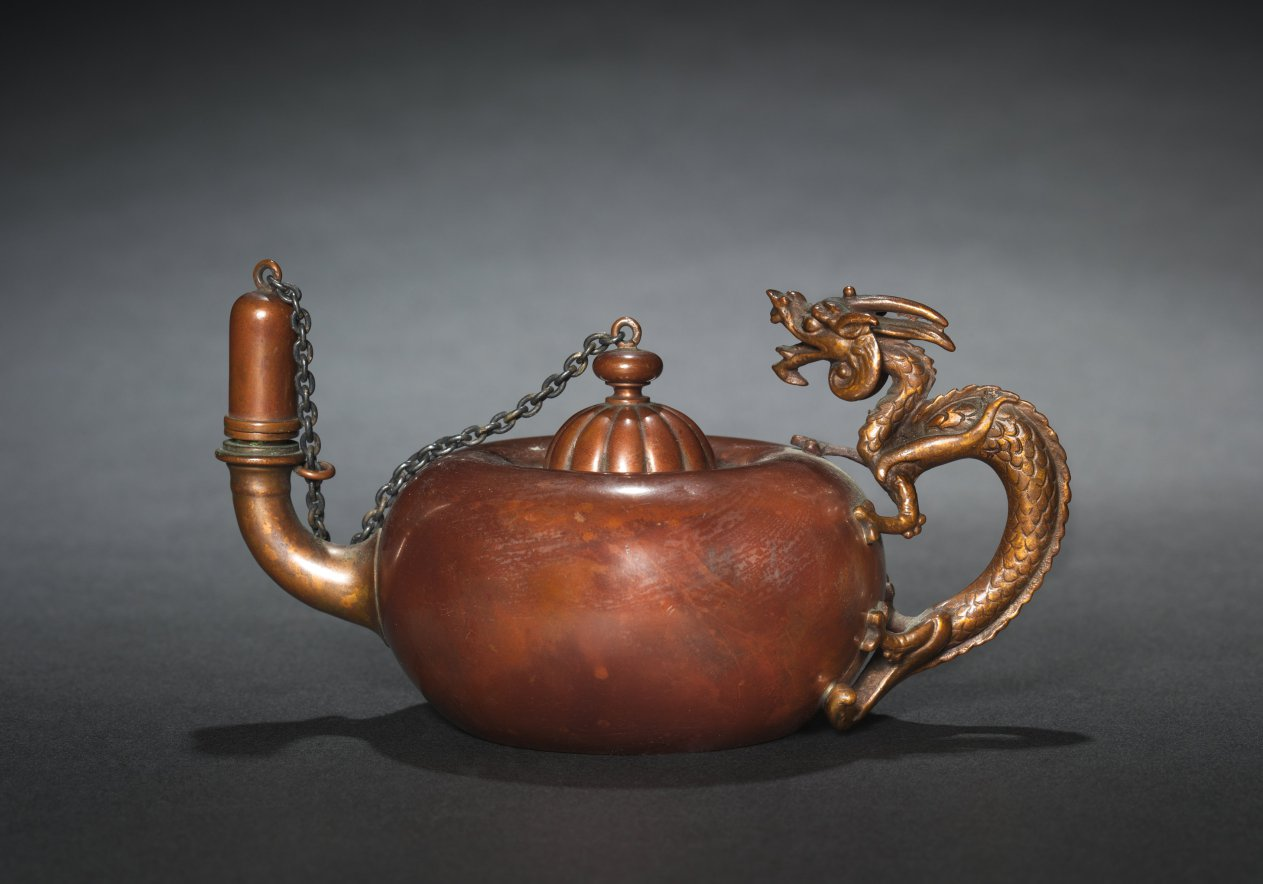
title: Oil Lamp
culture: America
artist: Gorham Manufacturing Company (America, est. 1831)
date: 1880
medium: copper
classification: Metalwork